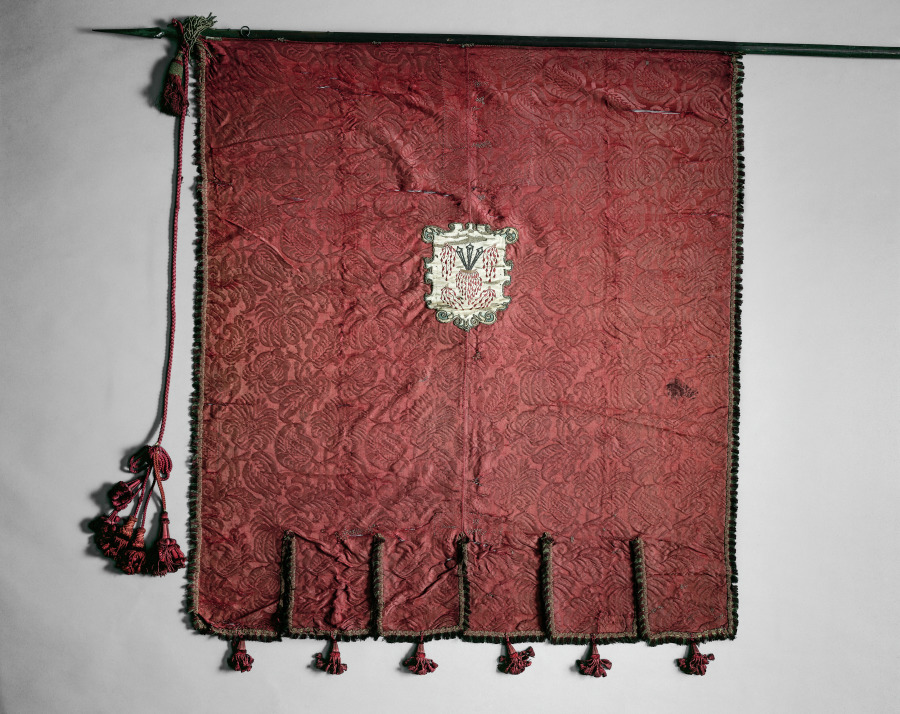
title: Banner with Medallions of Christ's Passion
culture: Spain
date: 1700s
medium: crimson silk brocade; satin; scalloped border with fringe and tassels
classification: Textile